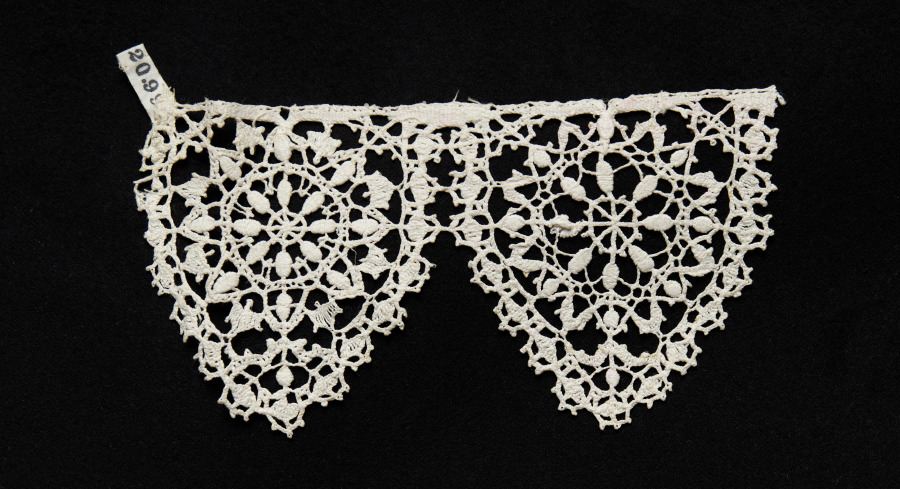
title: Lace Edging of Rounded Points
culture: Italy, Genoa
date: 1600s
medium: Bobbin lace (needle lace, rose lace design)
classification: Lace